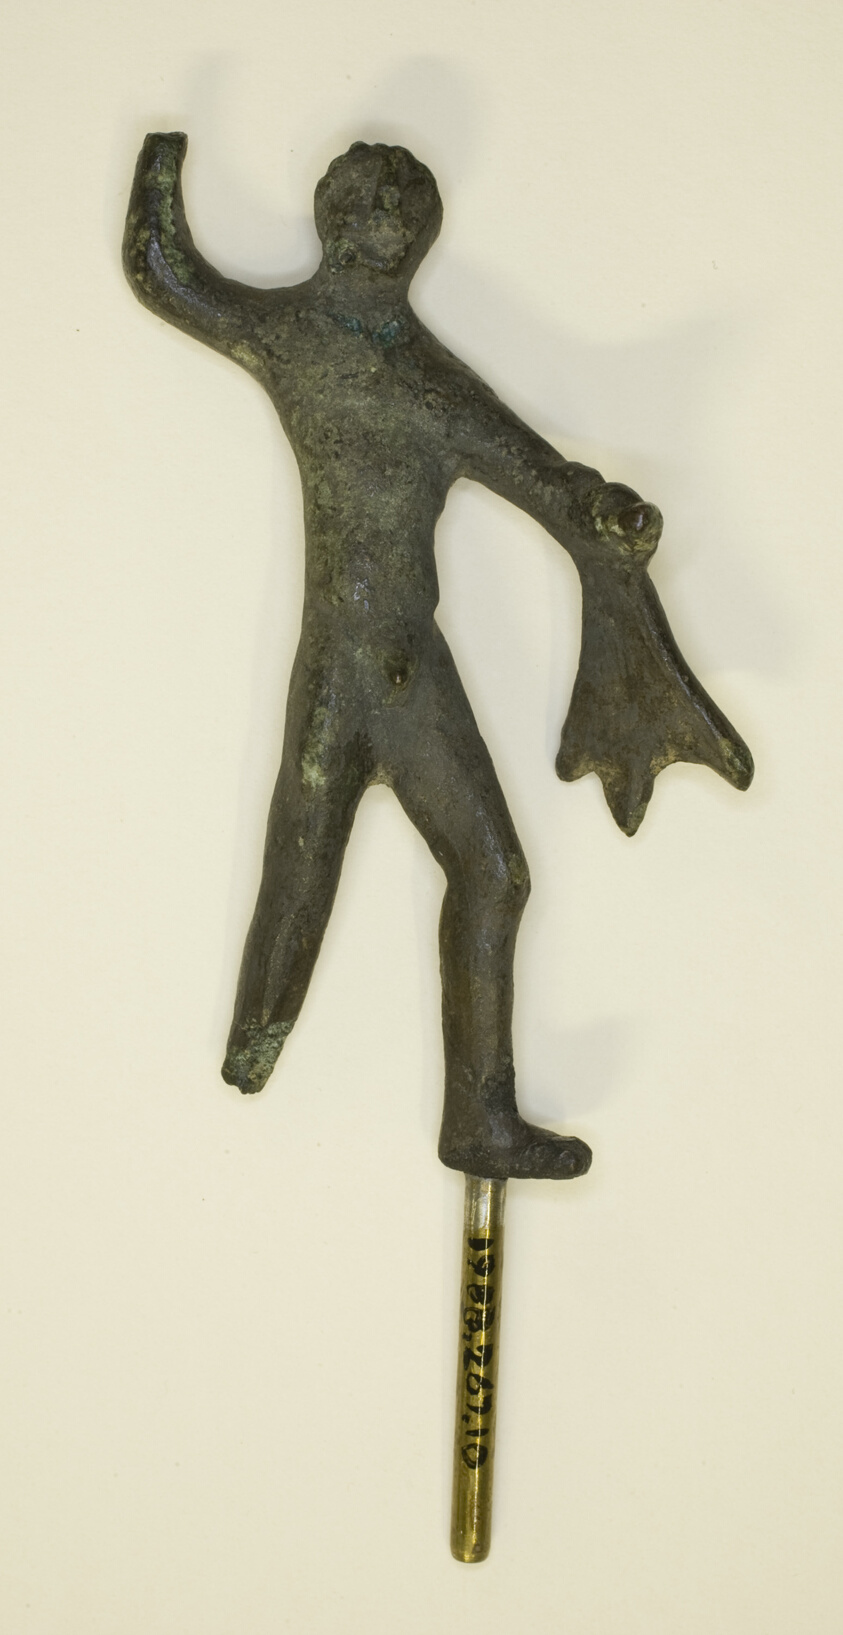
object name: Sculpture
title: Statuette of Herakles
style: etruscan, ancient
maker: Etruscan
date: 4th-3rd century BCE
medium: Bronze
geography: Etruria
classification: statuette; bronze; metal; sculpture; ancient art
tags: Heracles